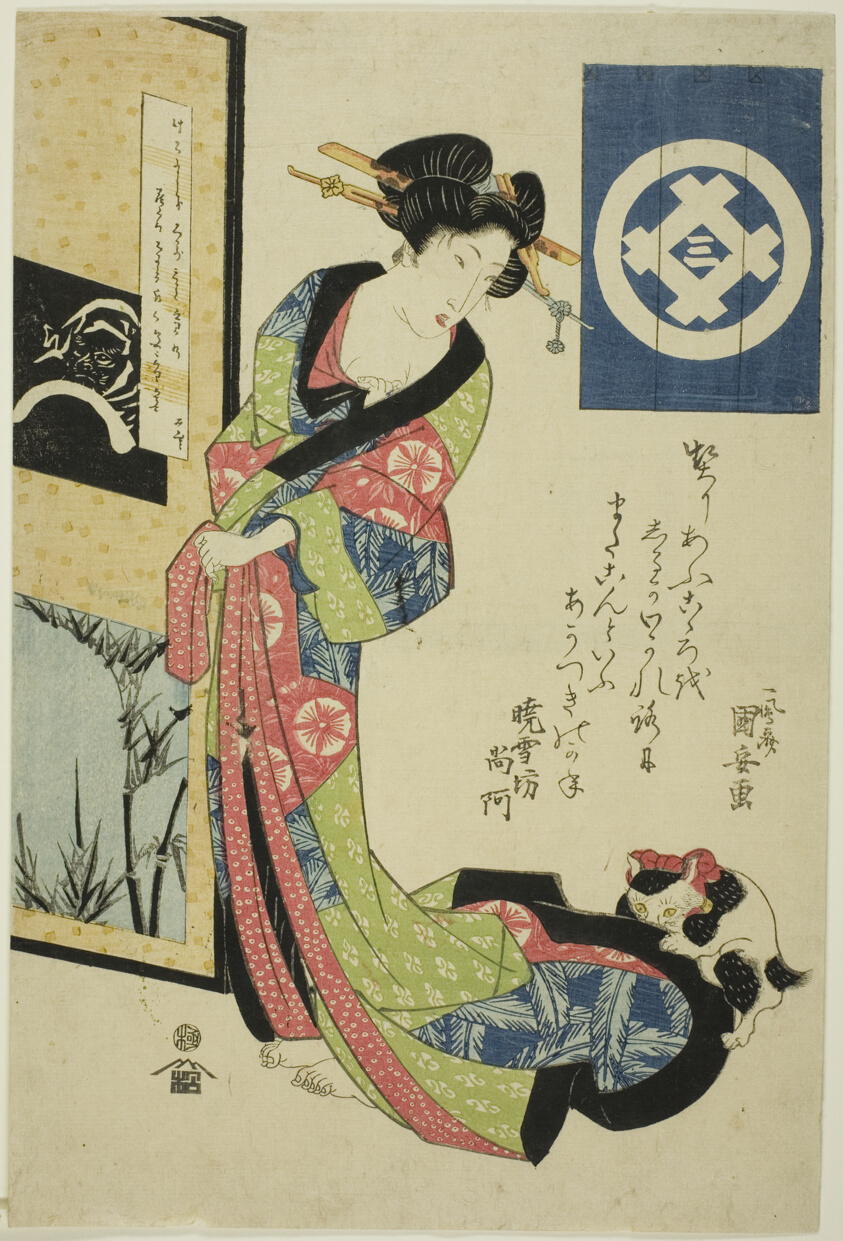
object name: Print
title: Beauty representing winter, from an untitled series of beauties representing the four seasons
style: Japanese (culture or style)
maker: Utagawa Kuniyasu (Japanese, 1794-1832)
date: c. 1818/30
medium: Color woodblock print; oban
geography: Japan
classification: print; asian art